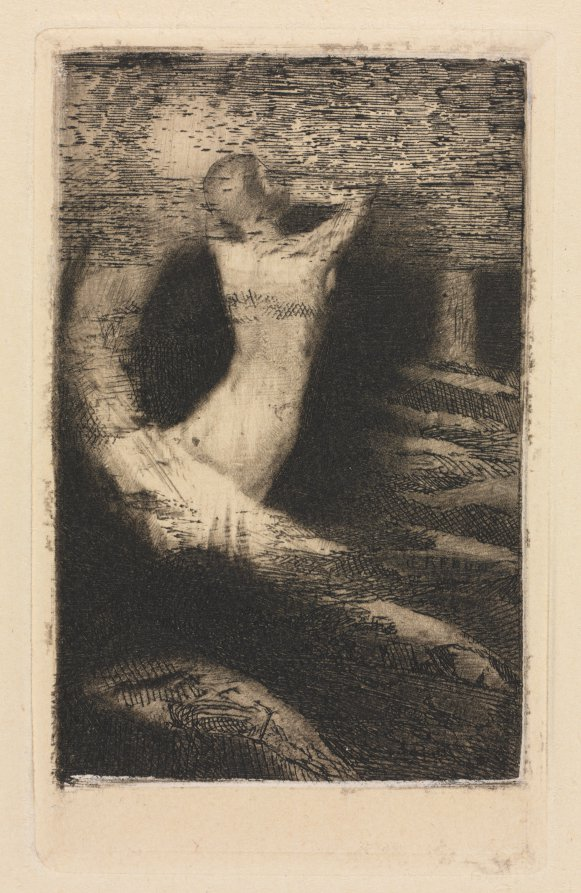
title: Passage of a Soul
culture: France, 19th century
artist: Odilon Redon (French, 1840–1916)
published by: Editions Lucien Vogel, Paris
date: 1891 (printed 1920)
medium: etching and drypoint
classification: Print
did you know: Odilon Redon created this work by cutting the plate from an existing print in two. He reworked the right side of the plate into the image seen here.